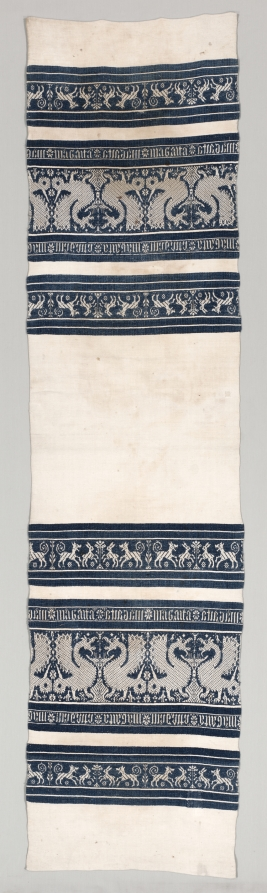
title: Woven Towel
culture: Italy, Perugia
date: 1400s (or later)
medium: cotton; supplementary weft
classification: Textile